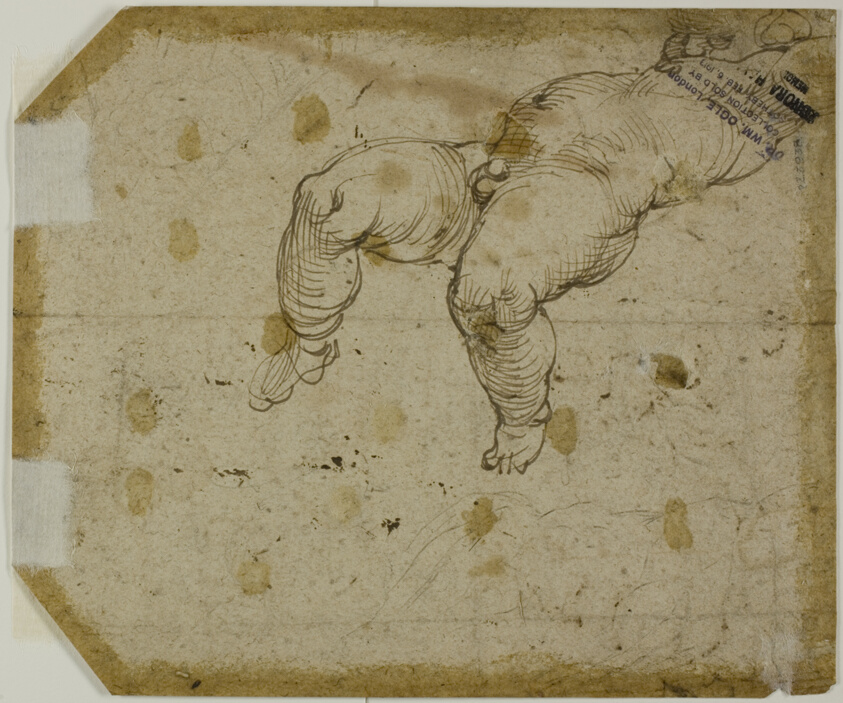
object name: Drawing and Watercolor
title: Two Sketches: Kneeling Putto Holding a Head (recto) Details of a Nude Male Child (verso)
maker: Bartolomeo Passarotti (Italian, 1529-1592)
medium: Pen and brown ink, with graphite, on buff laid paper, laid down on ivory wove paper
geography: Italy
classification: pen and ink drawings; drawings (visual works); prints and drawing